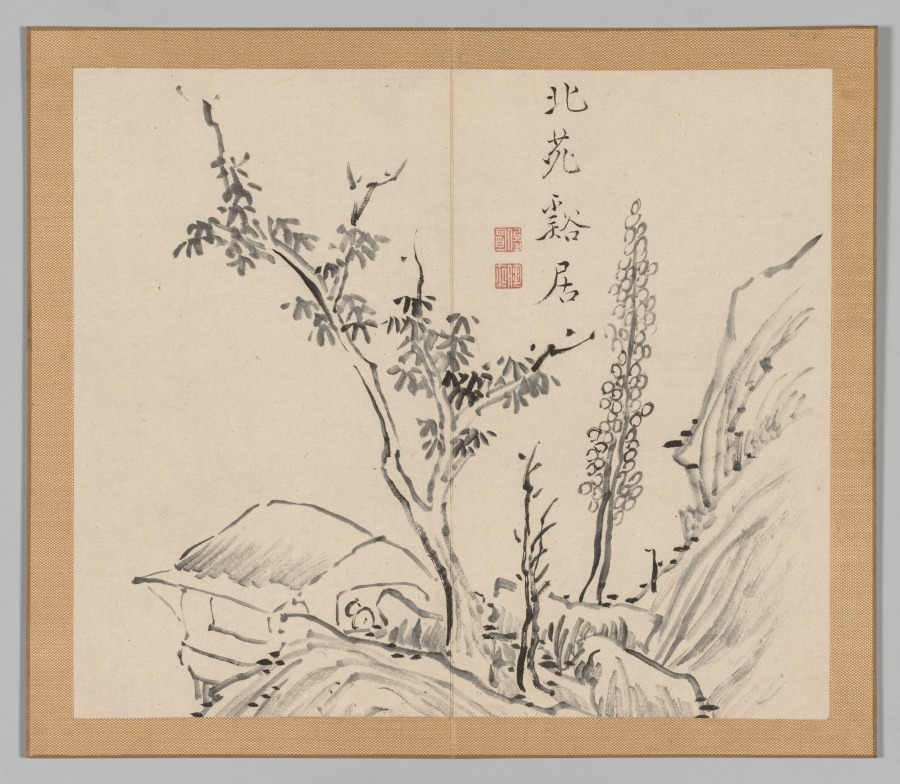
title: Reverberations of Taiga, Volume 2 (leaf 13)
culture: Japan, Edo period (1615–1868)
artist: Aoki Shukuya (Japanese, d. 1802)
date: mid- to late 1700s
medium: double-leaf from a pair of albums; ink and light color on paper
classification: Portfolio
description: Traditionally, young painters in Japan began their studies with an established master-painter. The master's compositions invariably became models that the apprentice copied to learn various ink and brush techniques. Shukuya was a pupil of the famous Kyoto artist Ikeno Taiga, whose style is reflected in these sketches of rocks, trees, and mountains.